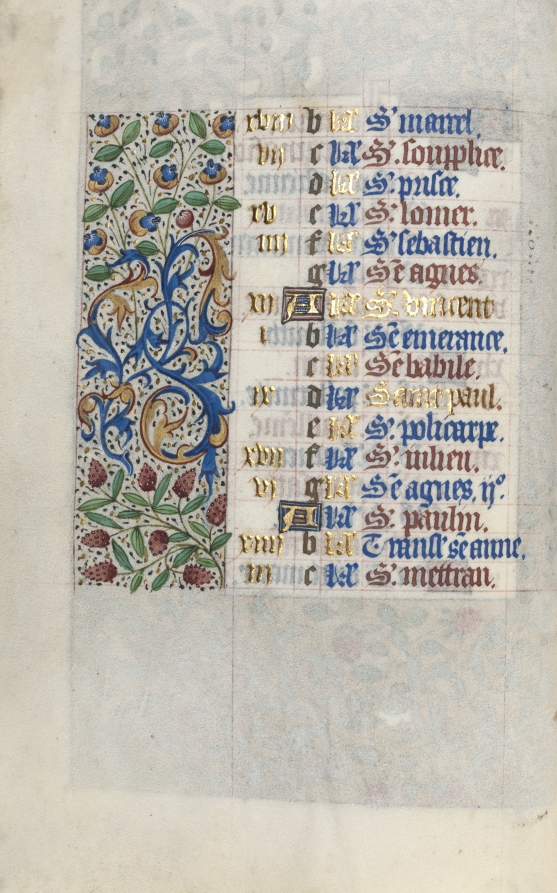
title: Book of Hours (Use of Rouen): fol. 1v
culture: France, Rouen, 15th century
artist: Master of the Geneva Latini (French, active Rouen, 1460–80)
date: c. 1470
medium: ink, tempera, and gold on vellum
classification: Bound Volume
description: In the late 1400s and early 1500s Rouen was an established and important center of book production. The city’s cathedral had a wealthy chapter that spent large sums of money to commission books and to maintain its extensive library. The stationers and booksellers would have likely been concentrated in or near the cathedral precinct. This artist, named after a manuscript now in Geneva, was Rouen’s principal illuminator during the second half of the 1400s.